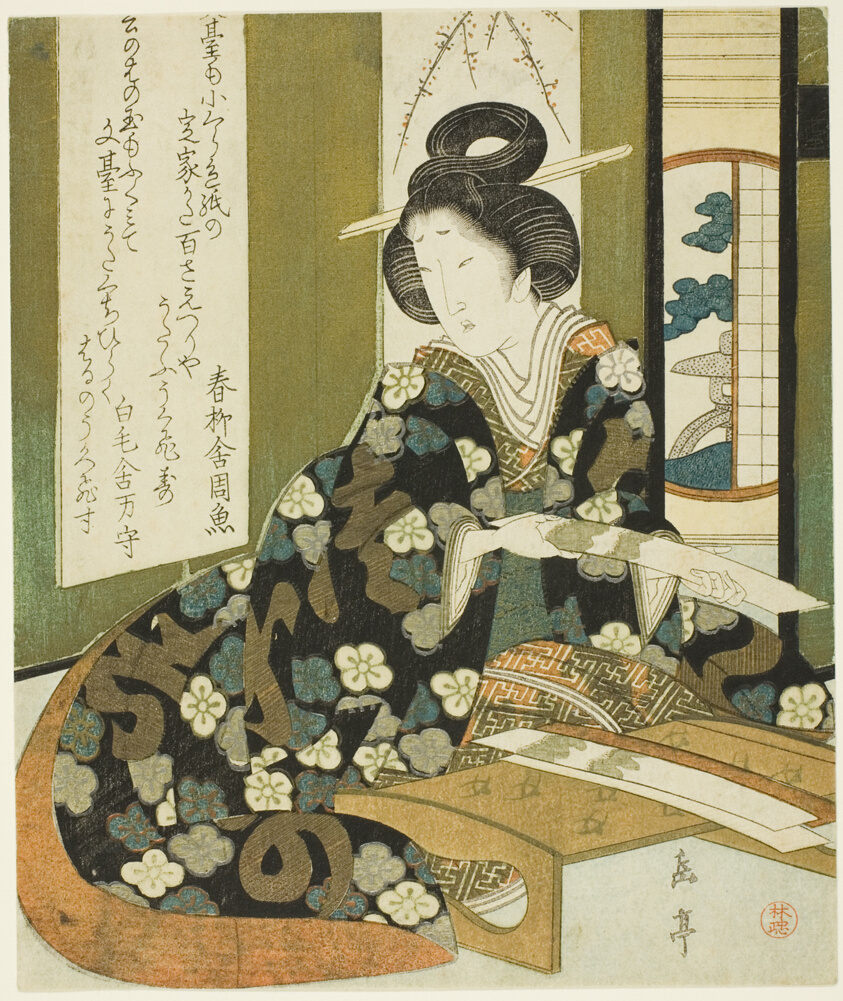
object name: Print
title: A Woman with a Poem Card, from the series "A Set of Seven for the Katsushika Club"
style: Japanese (culture or style)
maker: Yashima Gakutei (Japanese, 1786 (?)-1868)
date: c. 1825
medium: Color woodblock print with metallic pigments; surimono shikishiban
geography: Japan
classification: woodblock print; print; asian art